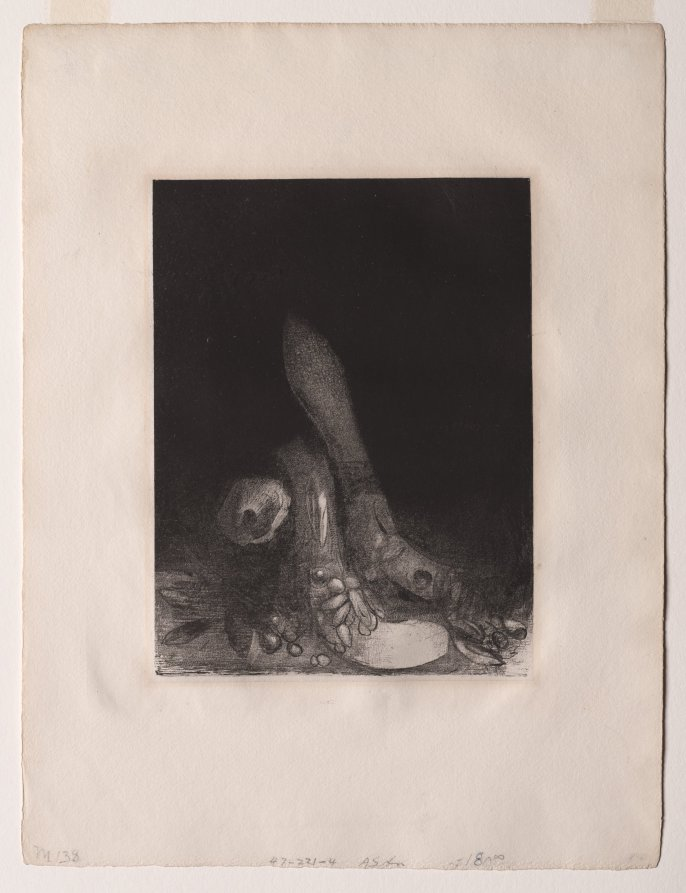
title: Flowers Fall and the Head of a Python Appears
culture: France, 19th century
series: The Temptation of St. Anthony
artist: Odilon Redon (French, 1840–1916)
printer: Blanchard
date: 1896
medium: lithograph on China paper laid on Arches wove paper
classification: Print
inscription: inscribed at lower left, in graphite: M 138; at bottom center: 47-221-4 As[illeg.] 180 00